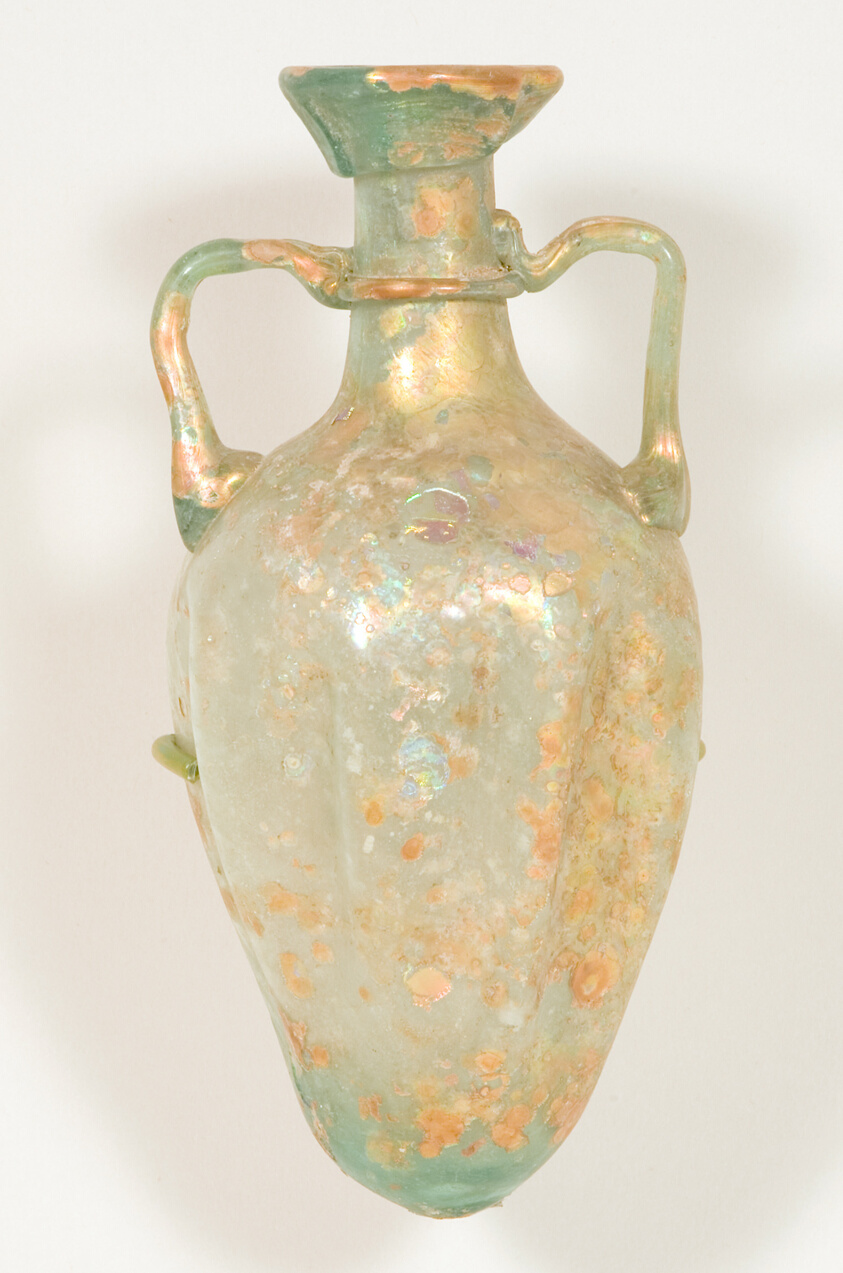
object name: Vessel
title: Doubled-Handled Flask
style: syrian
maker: Late Roman or Byzantine; Eastern Mediterranean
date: 4th–5th century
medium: Glass, blown technique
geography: Syria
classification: vessel; glass; ancient art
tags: containers